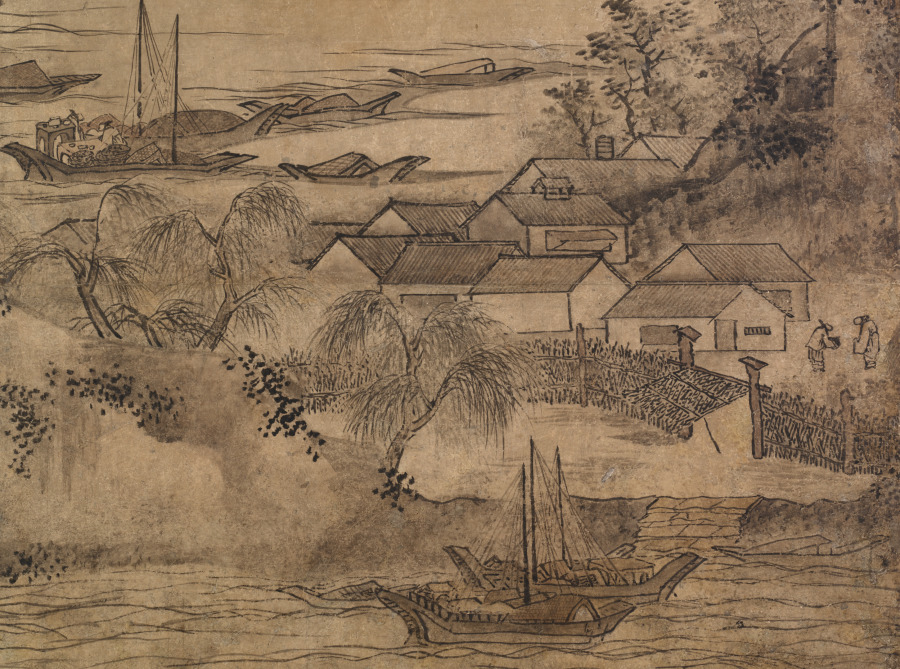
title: Landscape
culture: Japan, Muromachi period (1392–1573)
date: 1550–99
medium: One of a pair of six-panel folding screens; ink and color on paper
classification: Painting